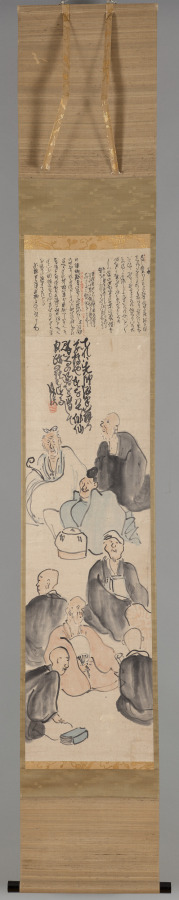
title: Gathering of Poetic Immortals with Poem Drafts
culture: Japan, Edo period (1615–1868)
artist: Matsumura Goshun (Japanese, 1752–1811)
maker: and Yosa Buson (Japanese, 1716–1783)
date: late 1700s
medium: hanging scroll; ink and color on paper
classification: Painting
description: When Yosa Buson died, his students raised funds for his daughter Kuno’s second marriage by selling their own paintings and calligraphies attached to surviving drafts of Buson’s poetry and commentary. Here, beneath a section of Buson’s manuscripts, Matsumura Goshun painted nine of the poets Buson judged to be the best at haikai, a humorous form of poetry in which poets take turns contributing verses to a poem. In his inscription, Goshun explained that his choice of subject relates to the content of Buson’s text.